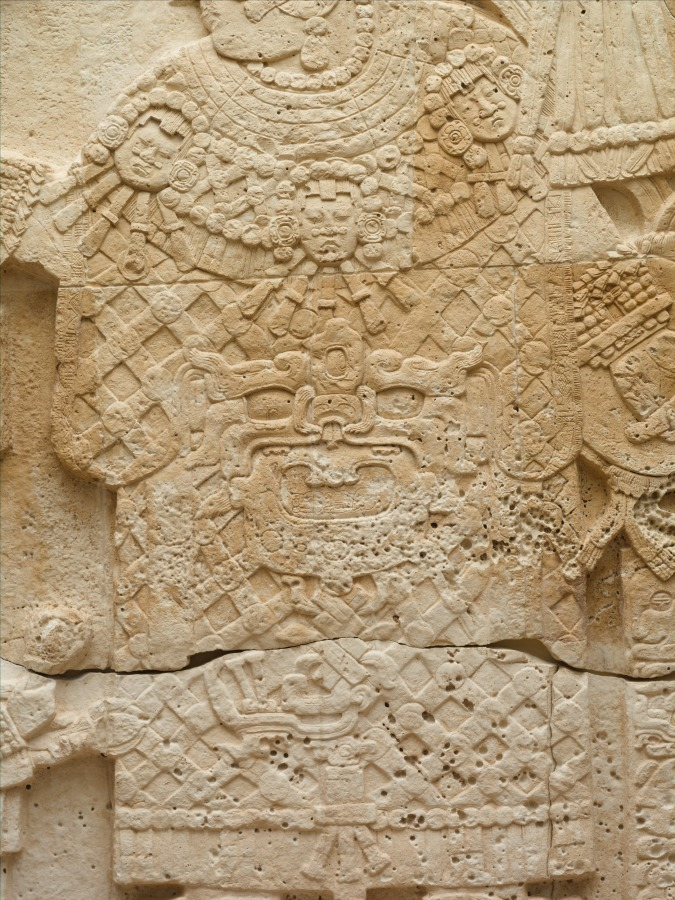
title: Front Face of a Stela (Free-standing Stone with Relief)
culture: Mesoamerica, Guatemala, Department of the Petén, El Perú (also known as Waka'), Maya (250-900), Classic period (200-1000)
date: 692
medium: limestone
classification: Sculpture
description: In stone sculpture, Maya rulers celebrated the milestones of their reigns with flamboyant portraits like this image of a royal woman, created to mark the passage of a twenty-year period known as the k’atun. She originally stood in a plaza next to a portrait of her spouse (see photo), with whom she ruled El Perú-Waka’, a provincial Maya town. A member of the powerful dynasty of a nearby Maya center, she seems to have held higher authority than her husband, serving as a military governor. Her costume reflects her status: the headdress has a fan of green quetzal feathers and her jewelry probably refers to jade-both among the most prized of ancient materials. Jade beads also may form the net over her garment, belted with the head of a fish-like creature. Completing the costume are the scepter and shield she grasps in her hands. The dwarf at her side may be a court attendant. The hieroglyphic text refers to important dynastic dates.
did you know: The powerful Maya queen shown on this stela is known as Lady K’abel.